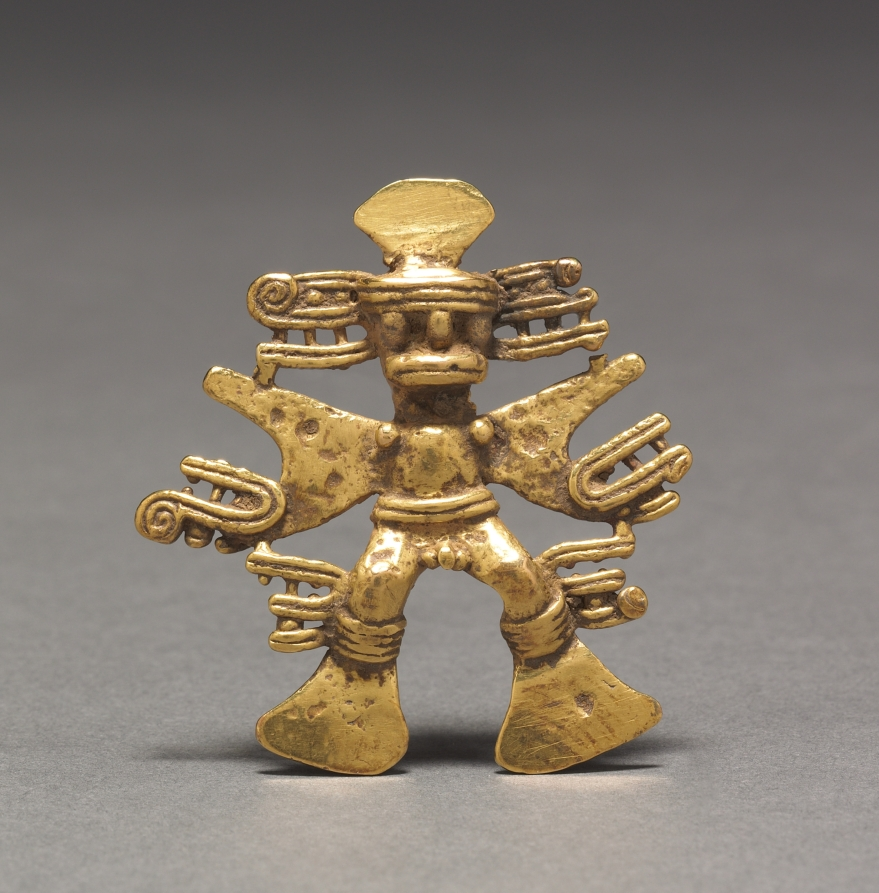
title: Figurine Pendant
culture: Southern Costa Rica, (Diquís Region), Diquís Style, c. 700-1550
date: c. 700–1550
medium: cast and hammered gold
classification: Metalwork